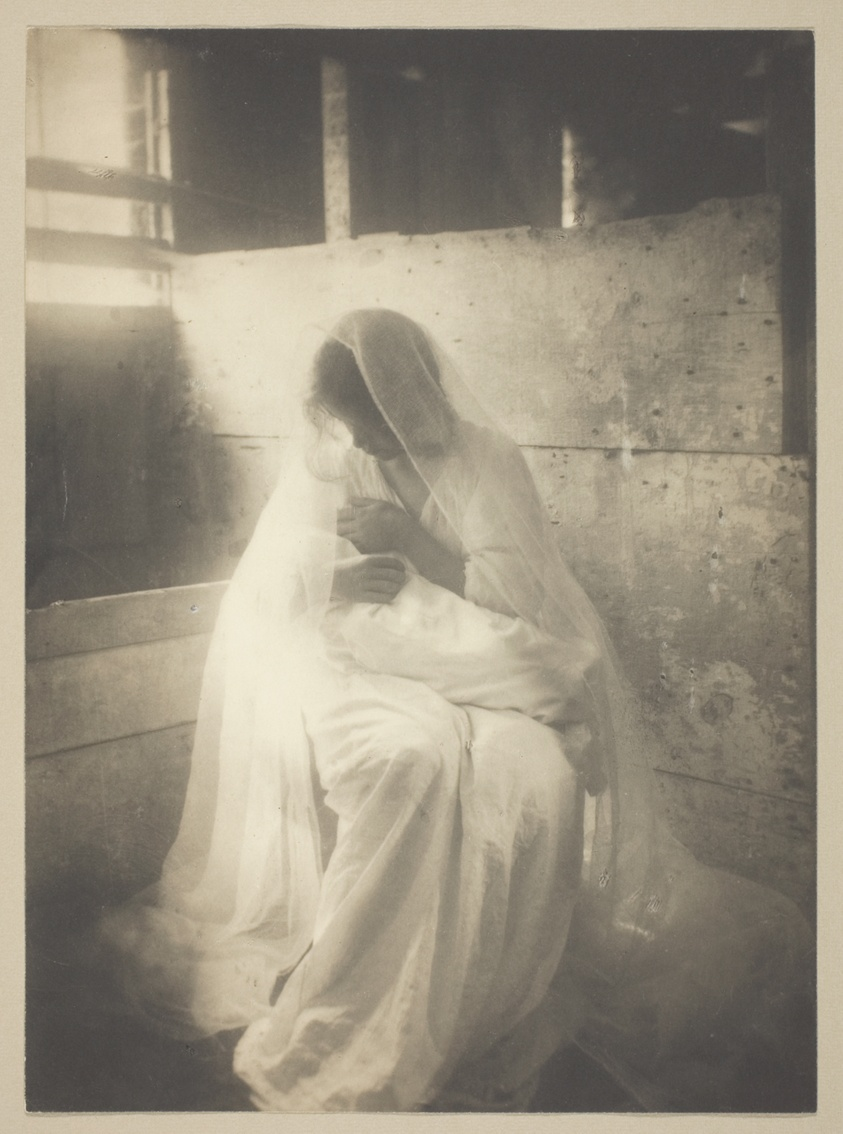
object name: Photograph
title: The Manger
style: Pictorialism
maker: Gertrude Käsebier (American, 1852–1934)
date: 1899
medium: Platinum print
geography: United States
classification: platinum print; photographic process; photography; photograph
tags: mothers, children, babies